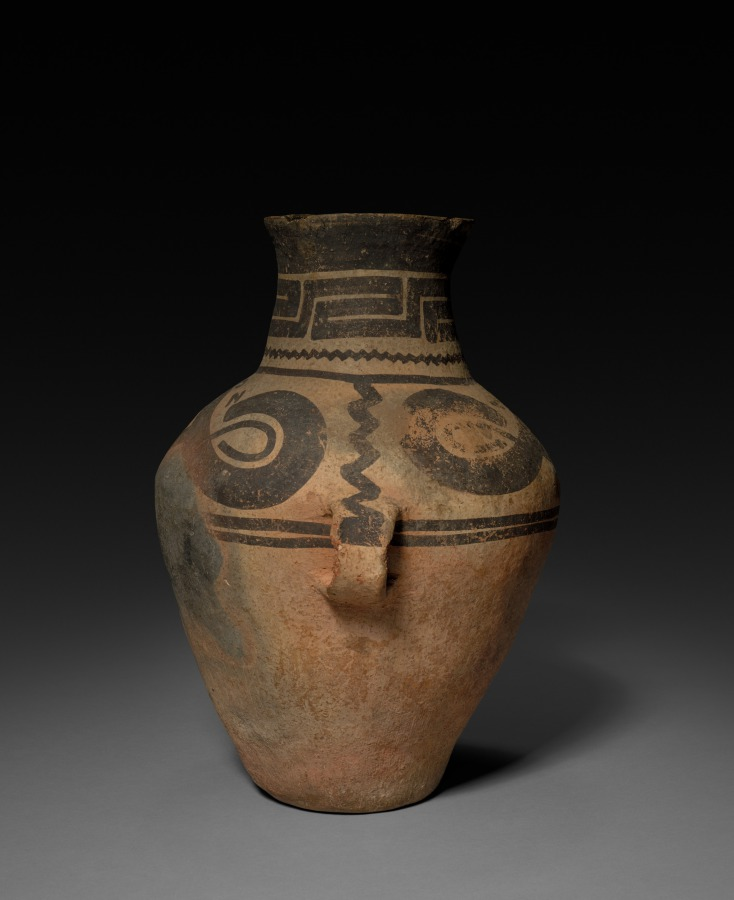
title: Urn with Lug Handles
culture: China, Gansu province, Xindian Culture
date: c. 1300–1000 BCE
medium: earthenware with slip coating and painted decoration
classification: Ceramic